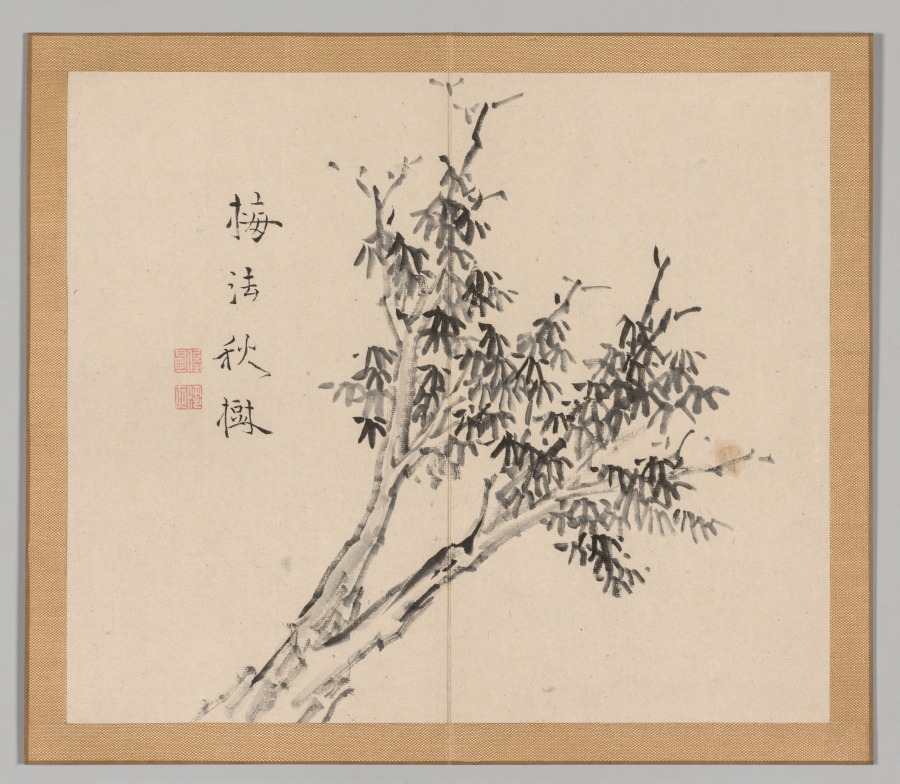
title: Reverberations of Taiga, Volume 1 (leaf 3)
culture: Japan, Edo period (1615–1868)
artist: Aoki Shukuya (Japanese, d. 1802)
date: mid- to late 1700s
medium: double-leaf from a pair of albums; ink and light color on paper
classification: Portfolio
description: Traditionally, young painters in Japan began their studies with an established master-painter. The master's compositions invariably became models that the apprentice copied to learn various ink and brush techniques. Shukuya was a pupil of the famous Kyoto artist Ikeno Taiga, whose style is reflected in these sketches of rocks, trees, and mountains.